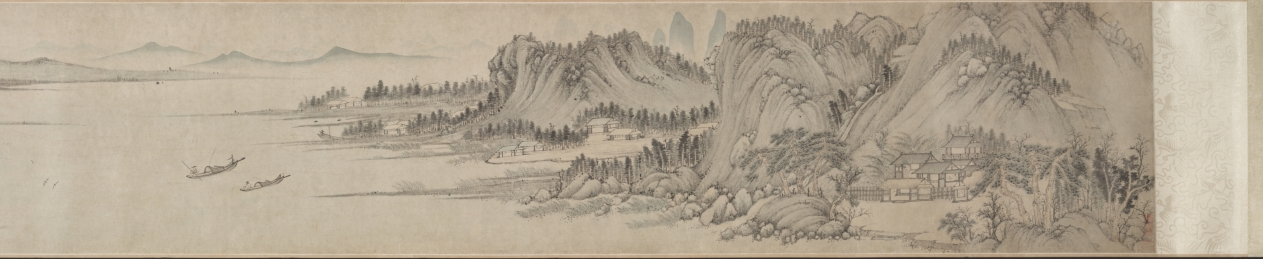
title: Mt. Taibo in the Style of Wang Meng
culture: China, Ming dynasty (1368–1644)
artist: Du Qiong (Chinese, 1396–1474)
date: 1442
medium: handscroll; ink and light color on paper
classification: Painting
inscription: Artist's inscription, signature, and 11 seals: [1 seal] Tung-yüan chai. Huang-ho-shan-ch'iao [Wang Meng] painted a painted called T'ai-po Mountain. Its brushwork is superior and admirable, which is very close to Yu-ch'en [Wang Wei, 699-759]. The cleverness of its composition, the maple groves and rustic temples, the inaccessible ravines and autumnal plateaus, the periolous peaks and strange rocks, etc., all seem to be so natural. The paper is only a little over eight feet, but the landscape has the range of a thousand miles. Once you open and note the contents, it is as if one were roaming among the mountain peaks enveloped in mist and clouds, and forgot the dusty world. When I first saw this, I was so mixed with excitement and joy that I could not take my hands off the painting. So I put it on the table, and tried my best to imitate it, forgetting sleeping and eating for about three months before it was completed. Although I do not dare to tread in the footsteps of Huang-ho shan ch'iao, I took great pains to capture his spirit in composition and colors. I do not know whether it would pass the judgment of the experts. On the fifteenth day of the fifth month, the seventh year of the Cheng-t'ung year [1442], inscribed by Tung-yüan, Tu Chiung. [2 seals] Yung-chia; Ching-chieh ming-men. [8 seals on painting] Tung-yüan chai; Ching-chieh ming-men; Yung-chia; Tu Ch'iung yin; Tung-yüan (repeated 5 times). trans. WKH/LYSL 3 colophons and 7 additional seals: 1 colophon and 2 seals of Chou Ting (1401-1487); 1 colophon and 2 seals of Wu K'uan (1435-1504); 1 colophon, dated 1655, and 2 seals of Lan Ying (1585-after 1664).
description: When a Chinese painter "imitated" a painting by a past master, the intention was never to produce an exact copy. Du Qiong, the Ming painter from Suzhou, is a case in point. The painting style of this handscroll is actually closer to that of Huang Gongwang (1269–1354) than to the style of Wang Meng (about 1301–1385). Both masters were active during the previous dynasty and are among the so-called Four Great Masters of the Yuan dynasty (1279–1368). In this painting, the interplay of styles, including Du Qiong's own, contribute to an inner dimension that is more than visual. Mt. Taibo is located in the province of Zhejiang and is known for its scenic beauty. In this scroll, however, it is not depicted literally. The image is an ideal representation of mountains in southeastern China.